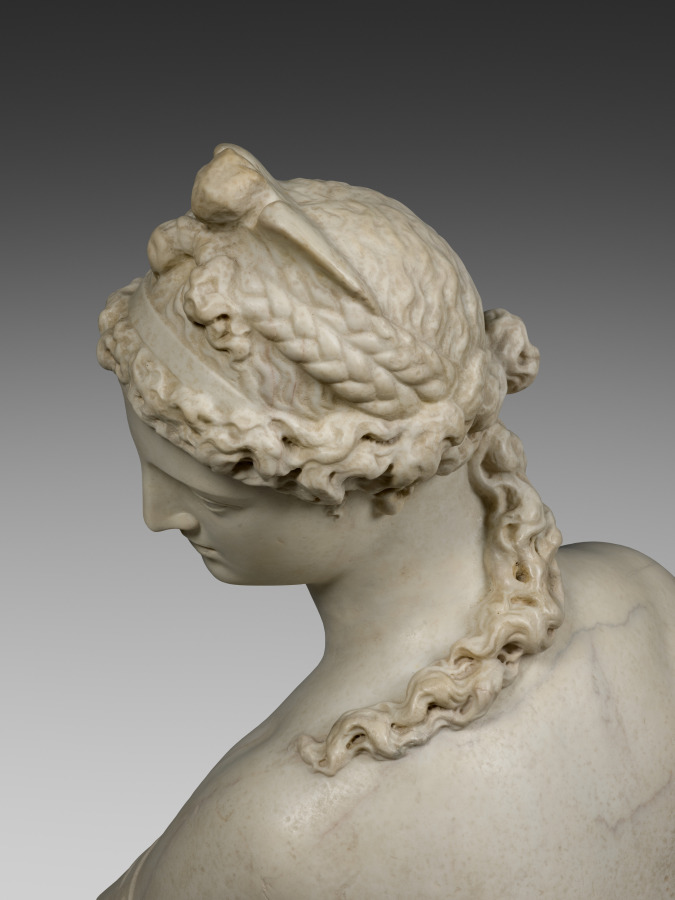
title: Fata Morgana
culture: Italy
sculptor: Giambologna (Flemish, active Italy, 1529–1608)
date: c. 1572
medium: Marble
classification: Sculpture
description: Commissioned by prominent banker Bernardo Vecchietti, whose surname means “old,” Fata Morgana took the name both of the nearby spring that fed the fountain she surmounted, and the legendary fairy who restored King Arthur’s youth. The Fata Morgana is one of only around a dozen sculptures in marble by Giambologna. The artist’s favorite subject was the female nude because of its capacity to showcase his extraordinary ability to model softness in hard stone and to convey dynamic movement. Her twisting pose invites the viewer to appreciate the Fata Morgana from every angle.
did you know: The sculpture originally appeared to emerge mysteriously from a cave within a constructed grotto.